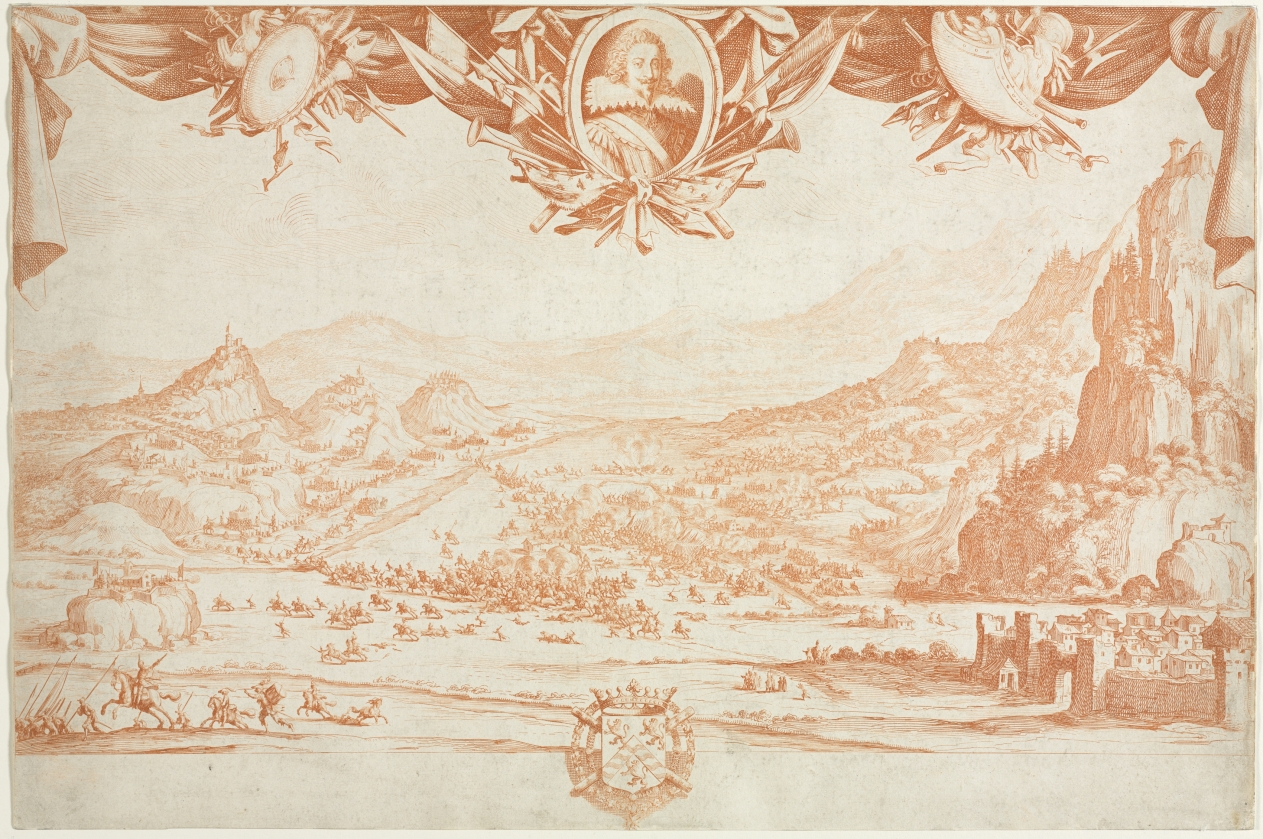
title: The Combat of Avigliamo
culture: France, 17th century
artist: Jacques Callot (French, 1592–1635)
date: 1631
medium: etching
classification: Print